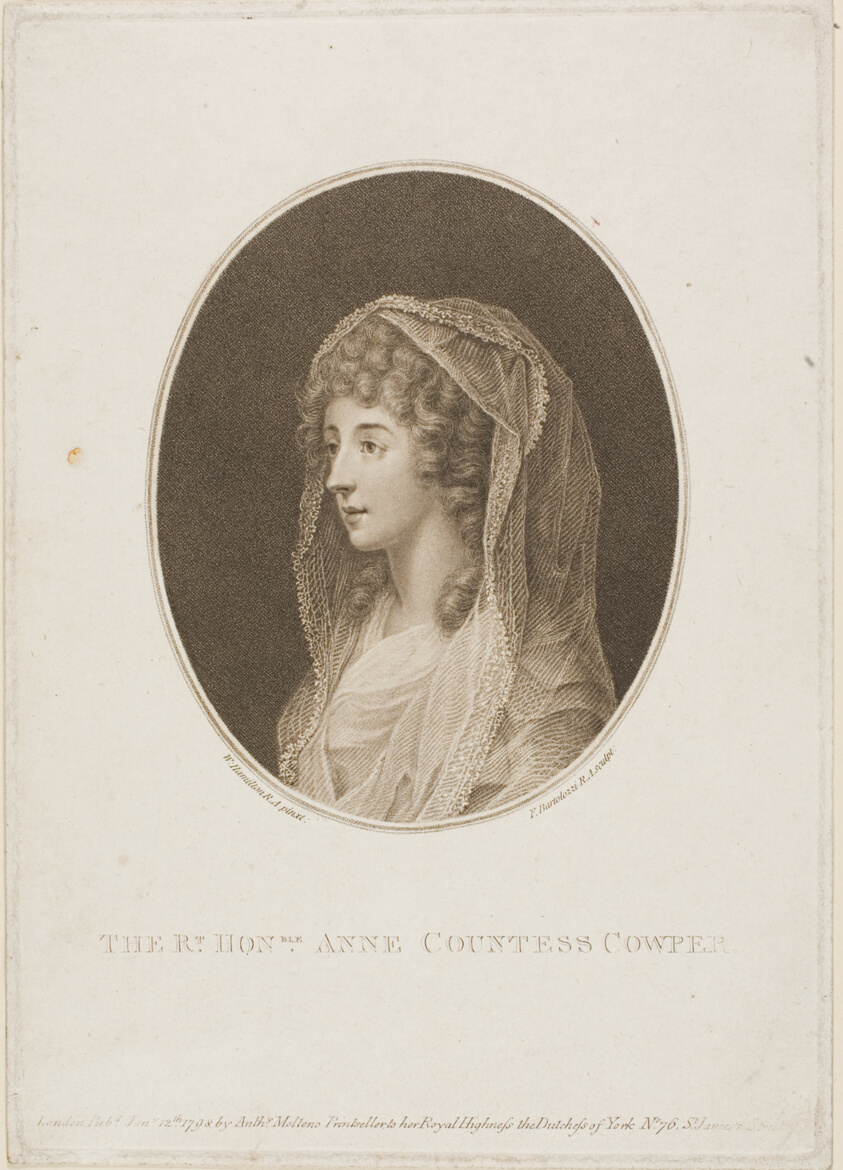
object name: Print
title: Anne Countess Cowper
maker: Francesco Bartolozzi (Italian, 1727-1815); after William Hamilton (English, 1751-1801)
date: published January 12, 1798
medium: Stipple engraving on paper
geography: Italy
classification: engraving; print; prints and drawing